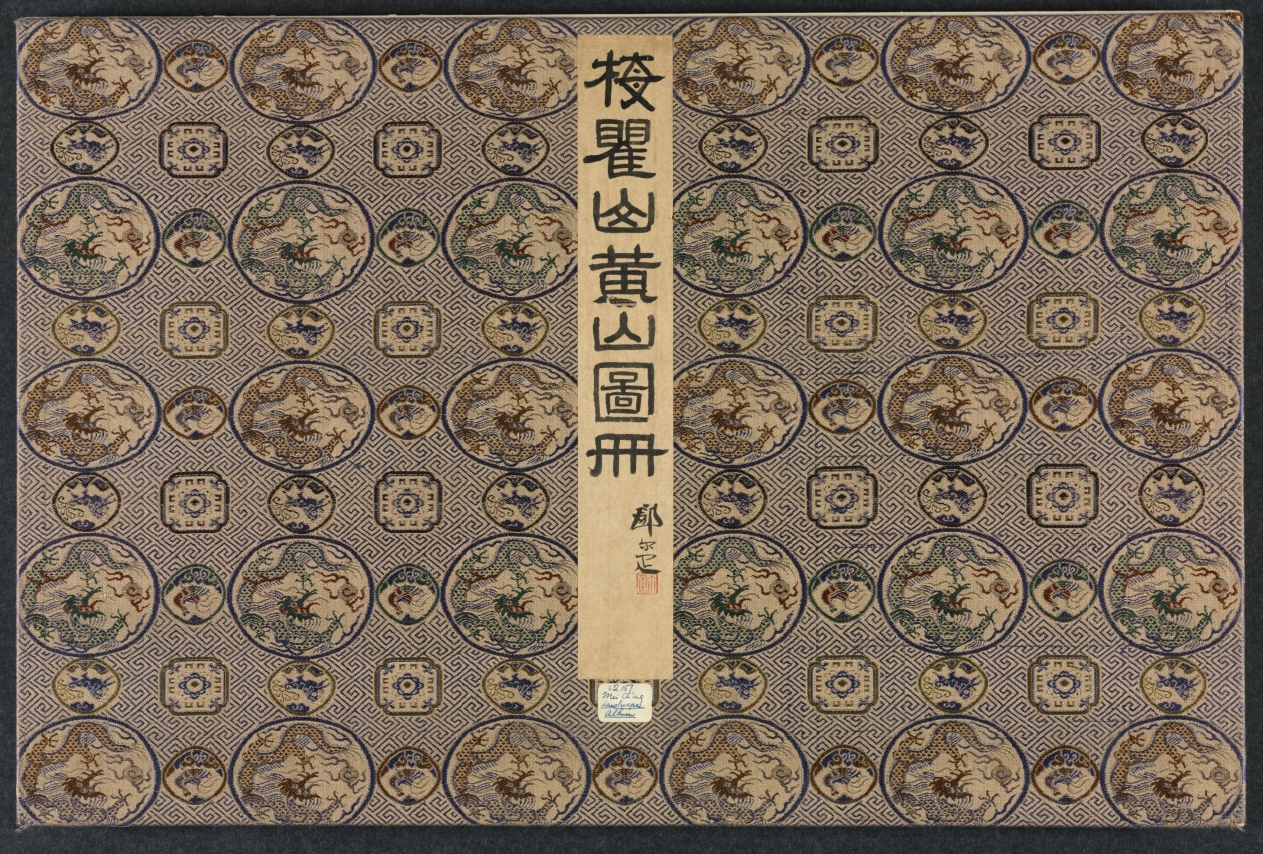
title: Landscapes in Various Styles after Old Masters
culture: China, Qing dynasty (1644-1911)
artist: Mei Qing (Chinese, 1623–1697)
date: 1690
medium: Album of ten leaves; ink and color on paper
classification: Painting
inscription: Artist's 10 inscriptions, signatures, and 35 seals.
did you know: Mei Qing produced a surge of new paintings after his 1690 tour of Huangshan’s breathtaking peaks.